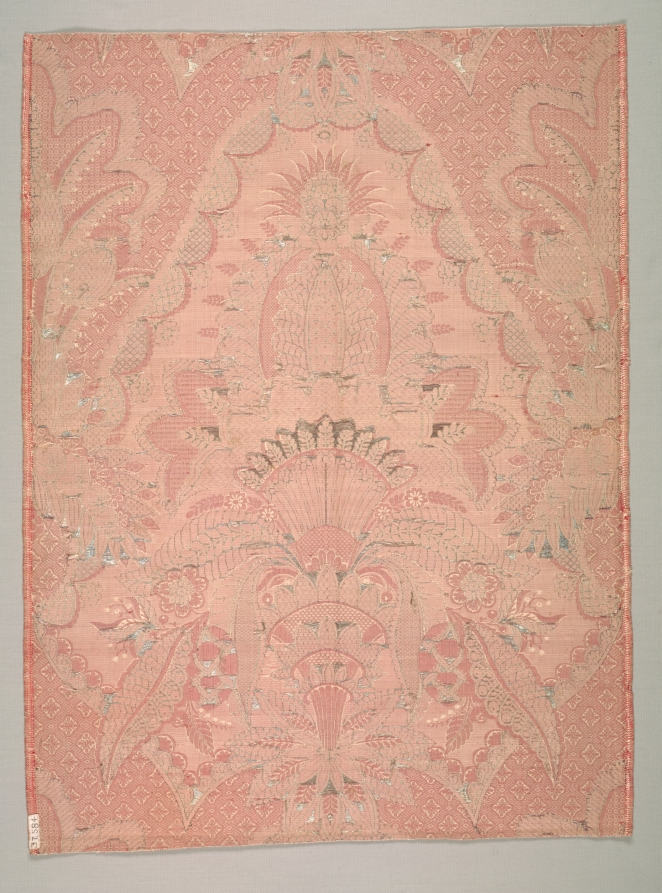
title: Textile Fragment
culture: France, early 18th century, late Baroque (1715-1725)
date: c. 1715–1725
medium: lampas weave, silk and gold thread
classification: Textile